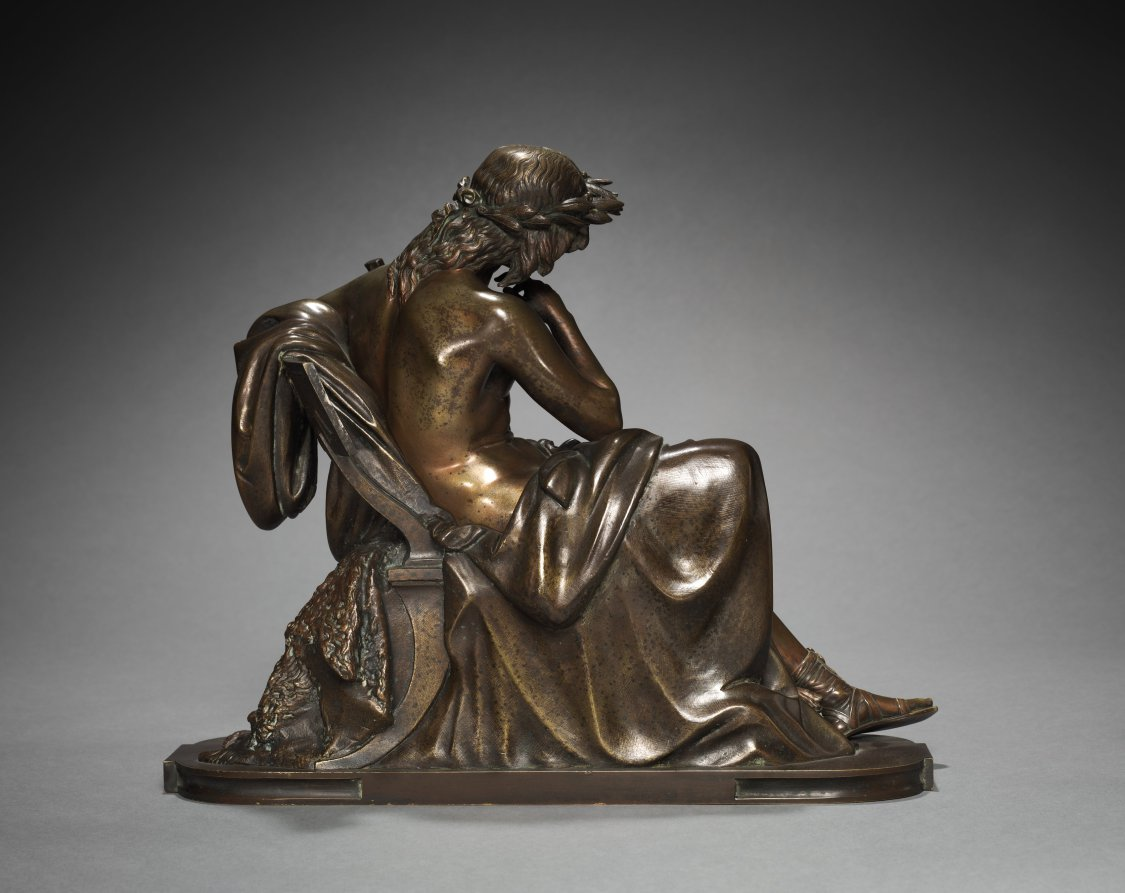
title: Orpheus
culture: France, 19th century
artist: Albert-Ernest Carrier-Belleuse (French, 1824–1887)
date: early 1860s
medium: bronze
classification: Sculpture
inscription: Signed: "A. Carrier"; inscribed: "Boyer"